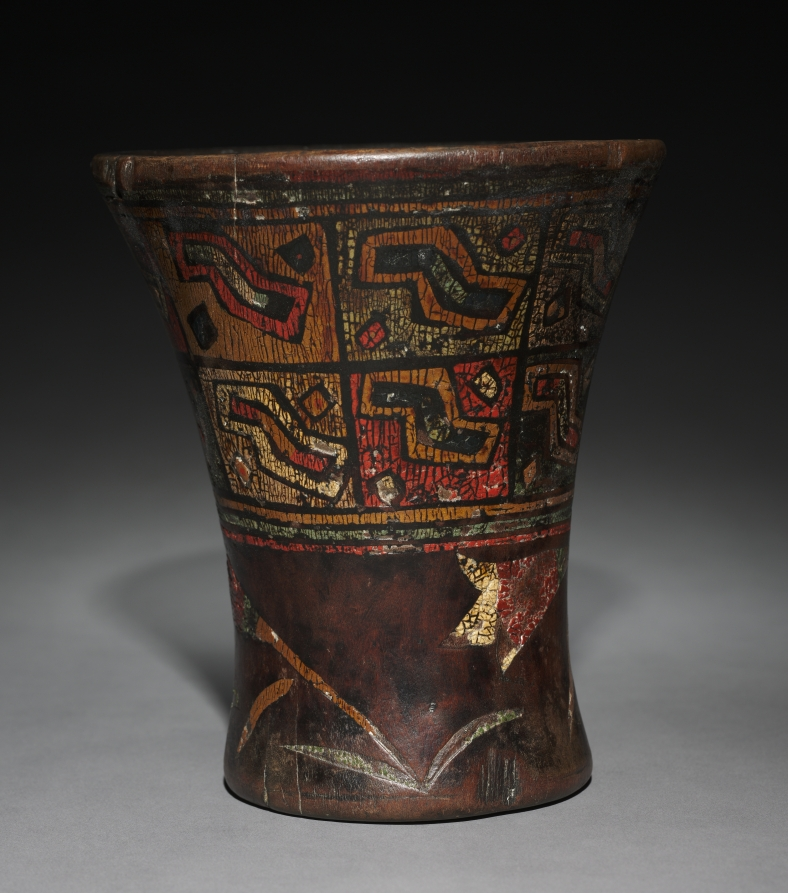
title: Kero (Waisted Cup)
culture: Peru, Colonial Inka style, 16th century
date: after 1550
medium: wood, inlaid pigments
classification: Wood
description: Keros, used to drink the maize beer chicha, were essential items of Inka statecraft. Made and used in pairs, they reflect the important Andean concept of reciprocity. Native use of keros continued in the colonial period, the date of these two examples, which come from separate pairs. The example with geometric motifs is closest to pre-conquest models. On the second, two armies converge: the Inka, dressed in tunics with waistbands, and their opponents, perhaps jungle people whose body parts are heaped in a centerpiece.